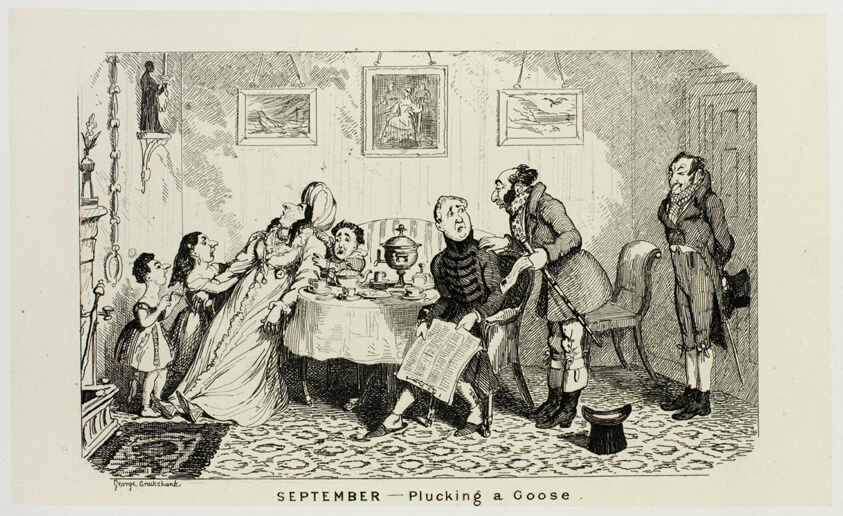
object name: Print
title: September - Plucking a Goose from George Cruikshank's Steel Etchings to The Comic Almanacks: 1835-1853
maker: George Cruikshank (English, 1792-1878); published by Pickering & Chatto (English, 19th century)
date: 1839, printed c. 1880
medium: Steel etching in black on cream India paper, laid down on off-white card (chine collé)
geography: England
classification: etching; paper; steel; print; prints and drawing